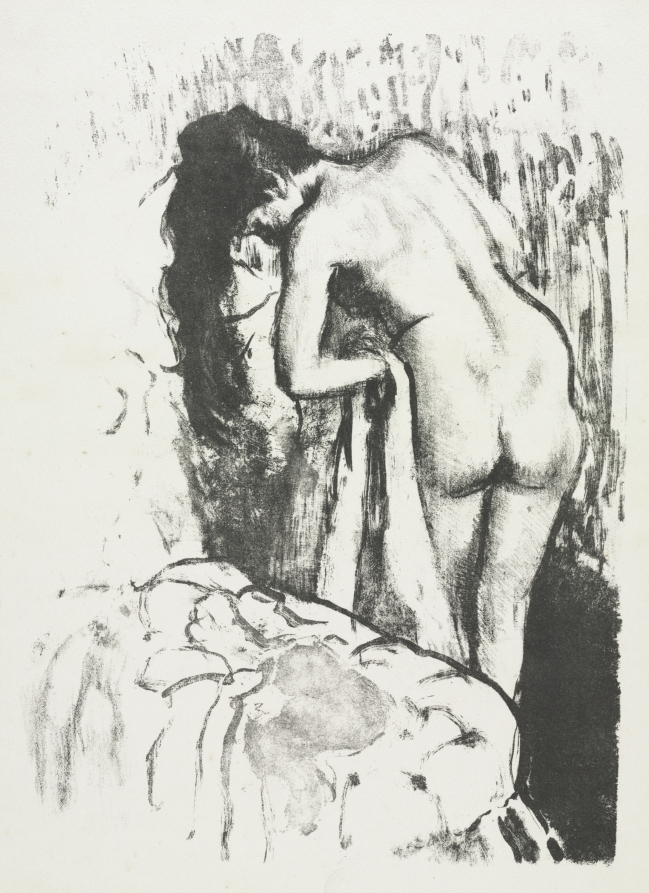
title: Nude Woman Standing, Drying Herself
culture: France, 19th century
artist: Edgar Degas (French, 1834–1917)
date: 1891–92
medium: lithograph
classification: Print